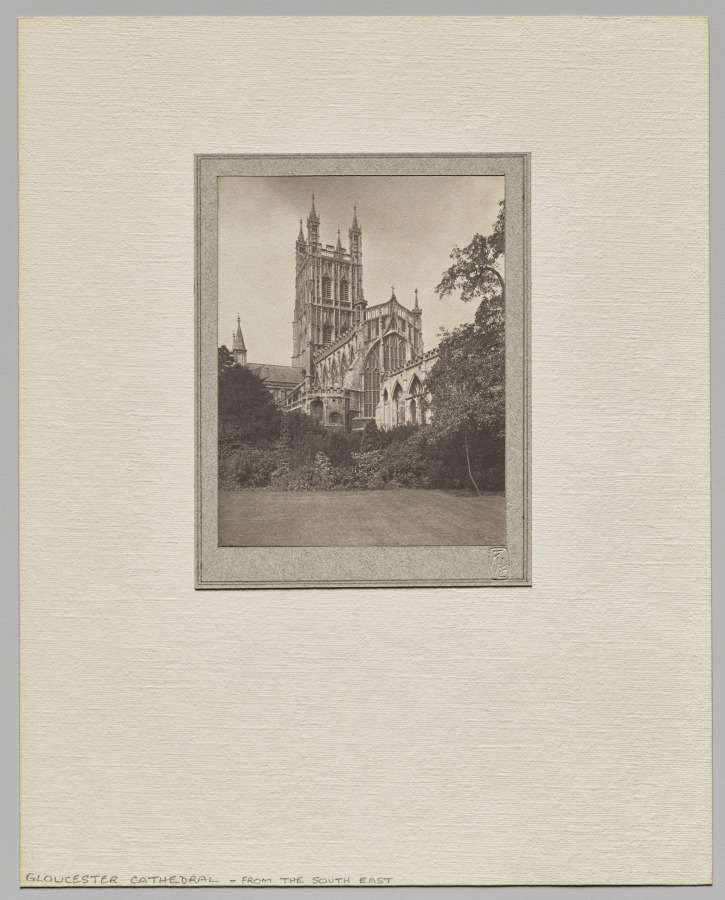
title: Gloucester Cathedral from the Southeast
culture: England, 19th century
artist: Frederick H. Evans (British, 1853–1943)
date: c. 1880s-90s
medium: platinum print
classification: Photograph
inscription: Embossed in lower right on recto of primary mount: “FHE”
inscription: Written in pencil in lower left on recto of secondary mount: “GLOUCESTER CATHEDRAL-FROM THE SOUTH EAST”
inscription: Ex-Libris label adhered to verso of secondary mount: “Ex Libris/Frederick H. Evans/Let those who/hold the torch/hand it on to/others”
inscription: Written in pencil on verso: “400.-“